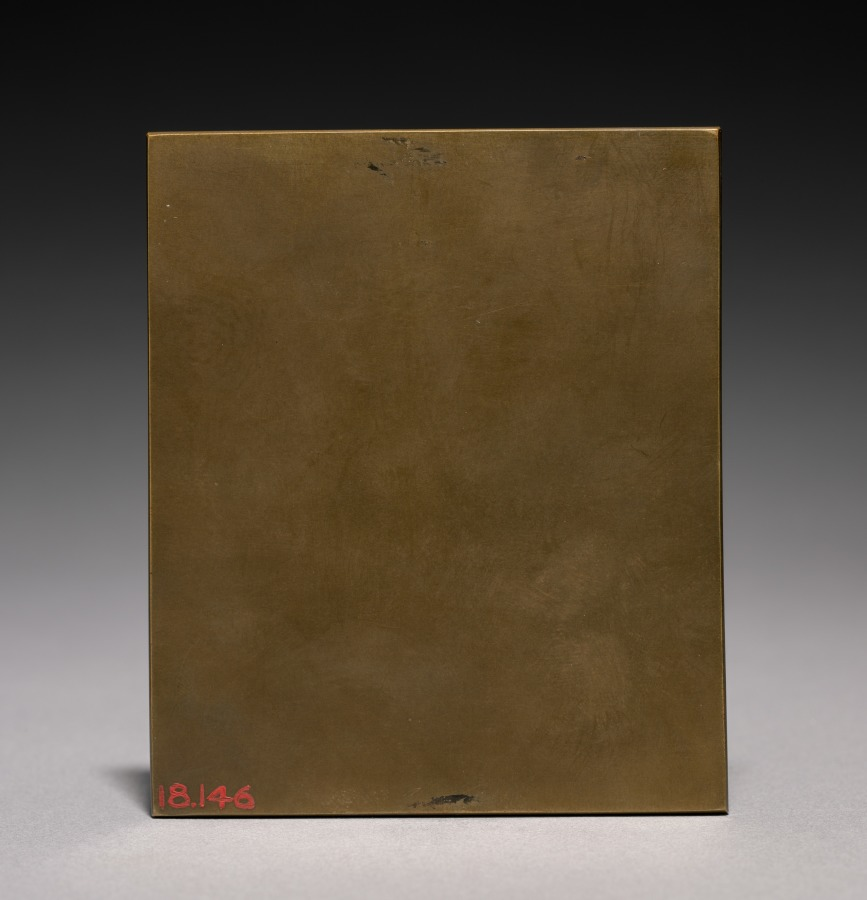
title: Medal Portrait of Ambrose Swasey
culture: America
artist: Victor D. Brenner (American, 1871–1924)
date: 1915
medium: bronze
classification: Metalwork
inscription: engraved on the lower edge: V. D. Brenner, 1915, Sc. No. 91.